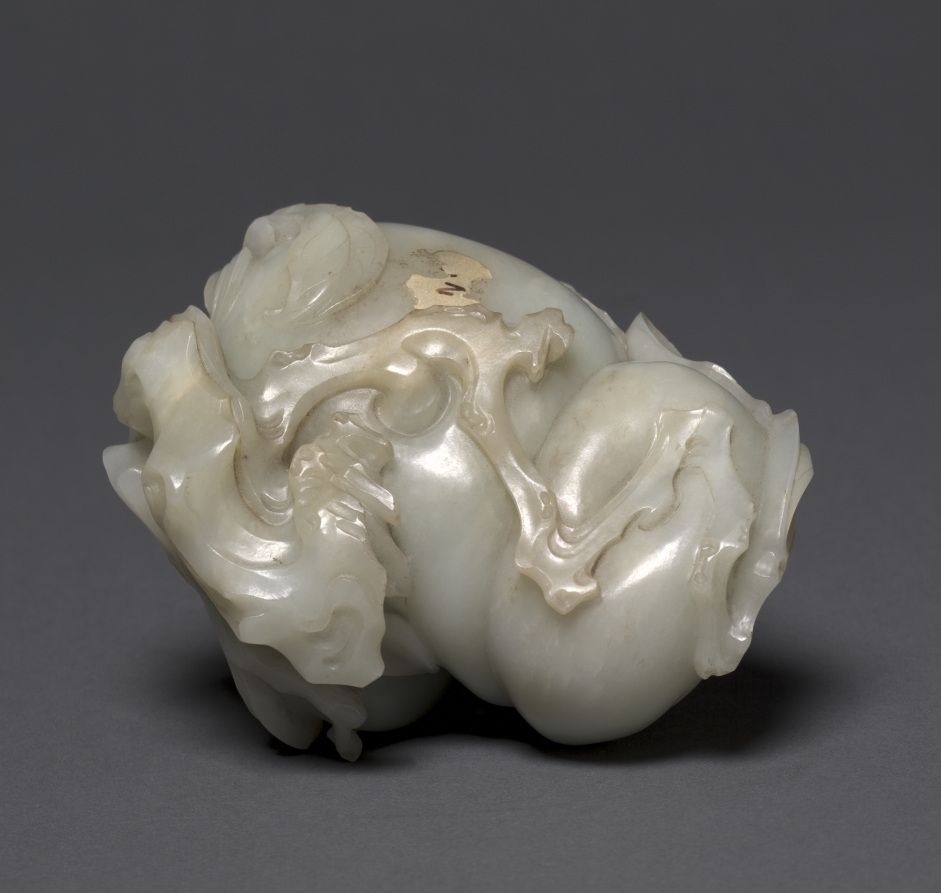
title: Peaches and Bats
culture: China, Qing dynasty (1644–1911)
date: late 1600s–1700s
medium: greenish-white jade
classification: Jade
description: This white jade is carved as a double peach with realistically detailed leaves and branch following the curve of the jade. Clinging to the edge are a pair of bats, which represent good fortune.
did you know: This jade sculpture was given to the museum in memory of John D. Rockefeller and his family.